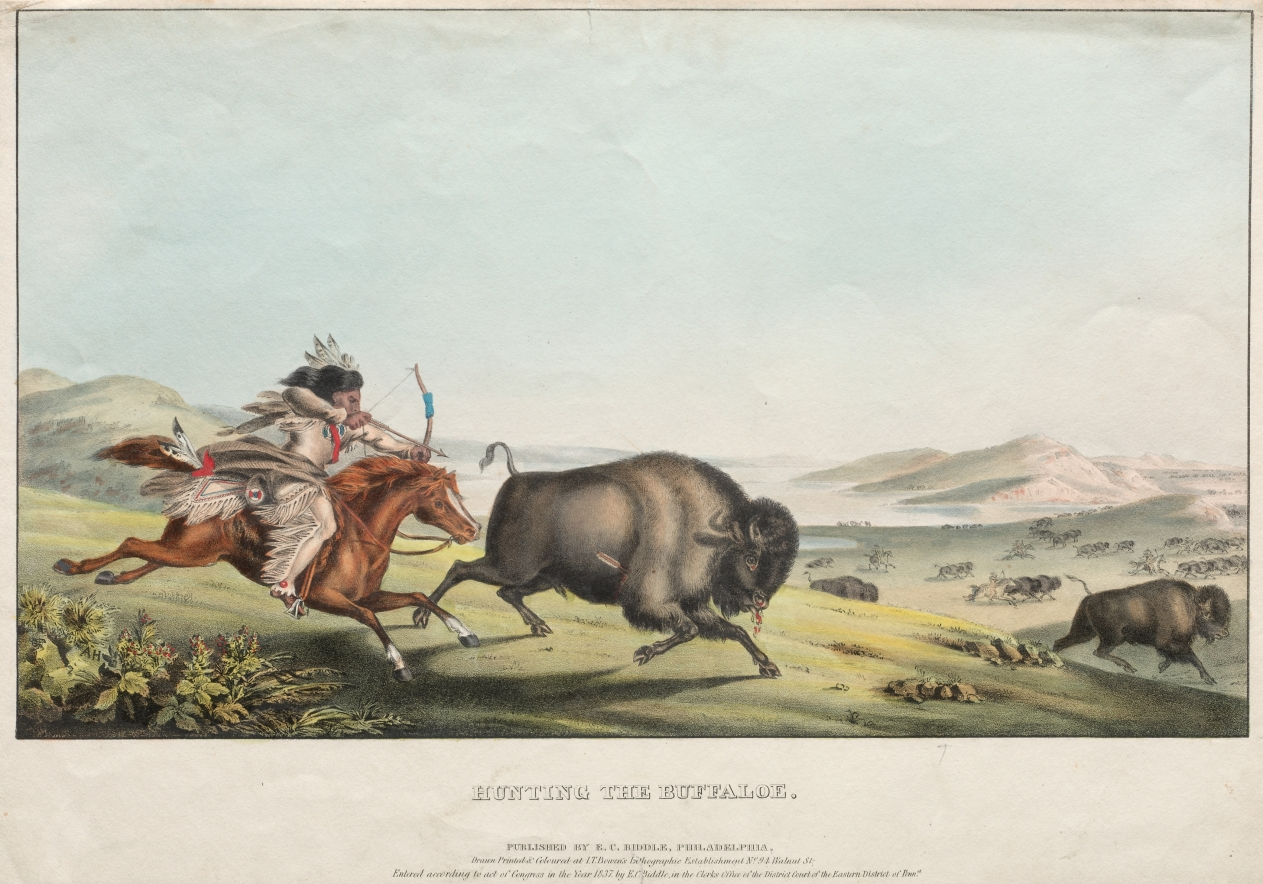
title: Hunting the Buffalo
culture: America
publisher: E. C. Biddle (American)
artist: John T. Bowen (British, c. 1801–1856)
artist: after Peter Rindisbacher (Swiss)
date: 1837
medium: lithograph, hand colored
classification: Print